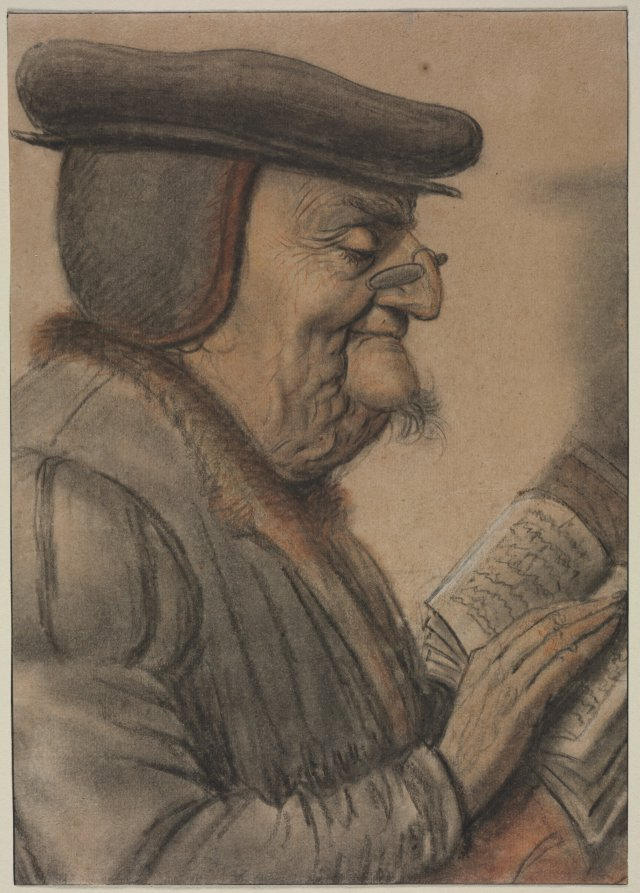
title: Elderly Man Reading a Book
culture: France, 17th century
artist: Nicolas Lagneau (French, 1590–1666)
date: first half 1600s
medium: black, red, white and chalk, with stumping; framing lines in black ink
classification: Drawing